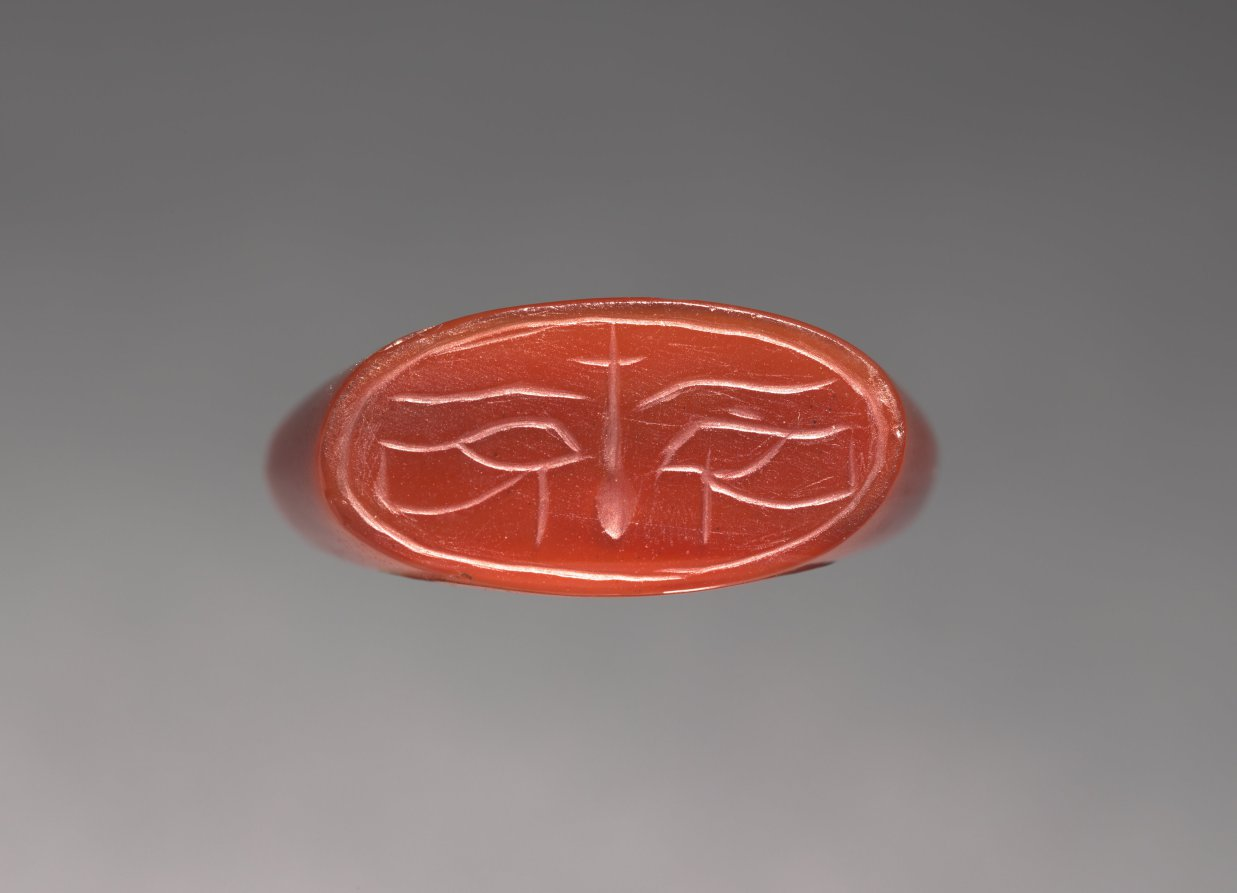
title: Finger Ring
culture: Egypt, New Kingdom (1540–1069 BCE), Dynasties 18–19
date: 1540–1186 BCE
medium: carnelian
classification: Jewelry